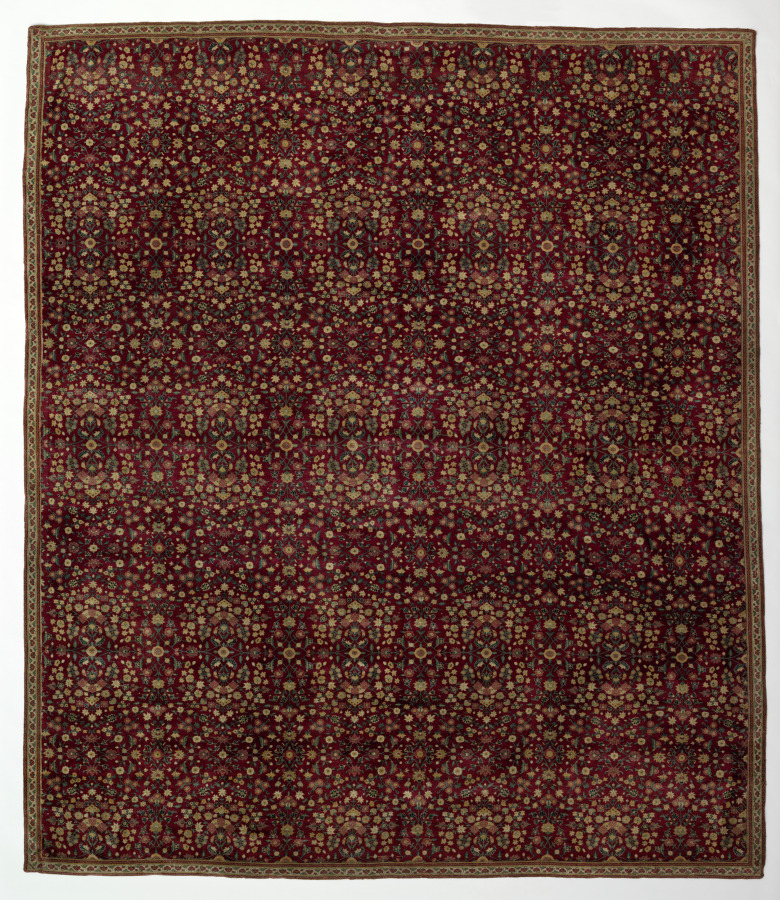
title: Woolen carpet with millefleurs decoration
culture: India, Kashmir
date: early 1600s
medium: Pashmina (wool): asymmetrical knot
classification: Carpet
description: Pashmina, a very fine fiber made from the fleece of Himalayan goats, was a material highly valued at the Mughal courts. Luxury rugs functioned in several ways, including as insulators for palatial and ceremonial spaces and as framing devices for important figures. In a biography of the Mughal emperor Akbar (reigned 1556–1605), called the Ain-i-Akbari, the court historian Abu’l Fazl (1551–1602) poetically wrote that such textiles created “a beautiful flowerbed.” The description is apt, as this carpet features an impressively symmetrical floral design known as millefleurs, or “thousand flowers” in French. Viewing several of these carpets and other hangings at once would have been visually impressive for court attendees.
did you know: The border contrasts with the central design, putting red flowers against a white background.